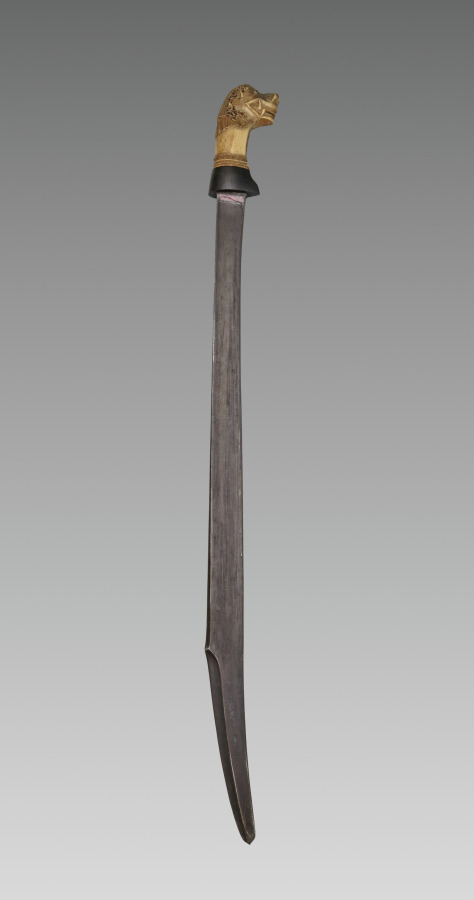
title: Sword and Scabbard (sword)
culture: Java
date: 1700s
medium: steel and ivory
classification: Arms and Armor